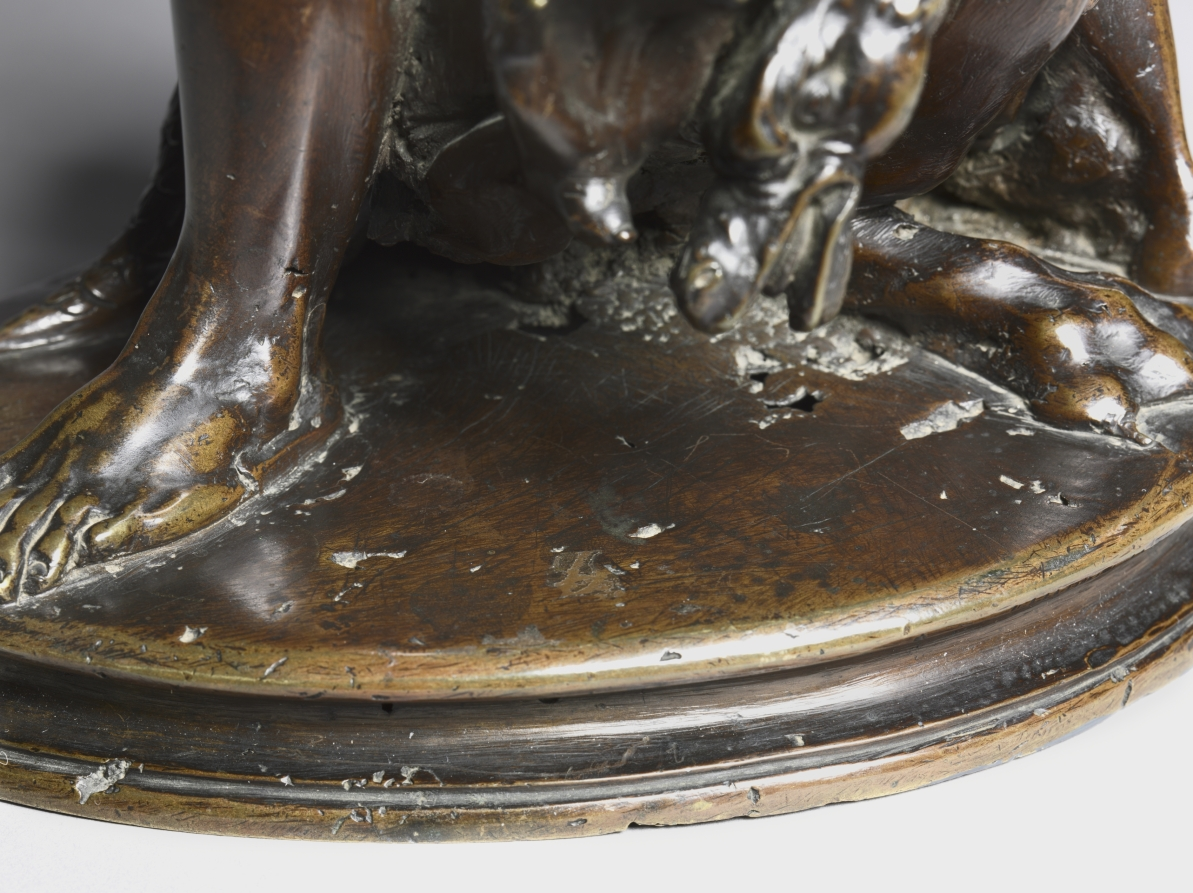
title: Hercules and the Hydra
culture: Northern Europe, late 16th-early 17th century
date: late 1500s-early 1600s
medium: bronze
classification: Sculpture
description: Hercules slayed the Lernean Hydra as the second of the ancient hero’s twelve labors. When one of the nine snake-like heads was destroyed, two grew back. Hercules cauterized each stump, allowing him eventually to kill the monster. The object he holds may have been a club, sword, sickle, or torch. The sinuous, scaly Hydra and the defined musculature presented challenging opportunities for sculptors working in bronze. The raw, tumultuous energy and twisting form-associated with artists of the late 1500s-contrasts to Jacopo Sansovino’s earlier Virgin and Child (1951.316).